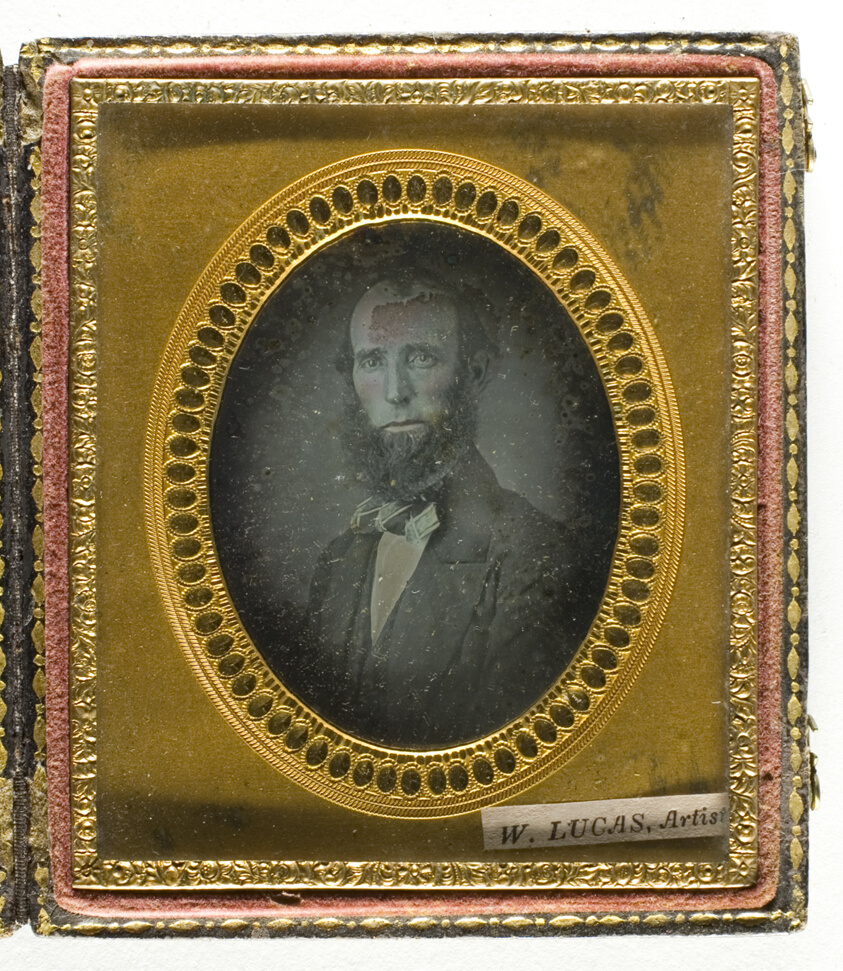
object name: Photograph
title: Untitled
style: 19th century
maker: W. Lucas (19th century)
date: 1839/99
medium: Ambrotype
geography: Unknown Place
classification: ambrotype; photographic process; photography; photograph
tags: portraits, portraits: male subject, photography, formal portraits